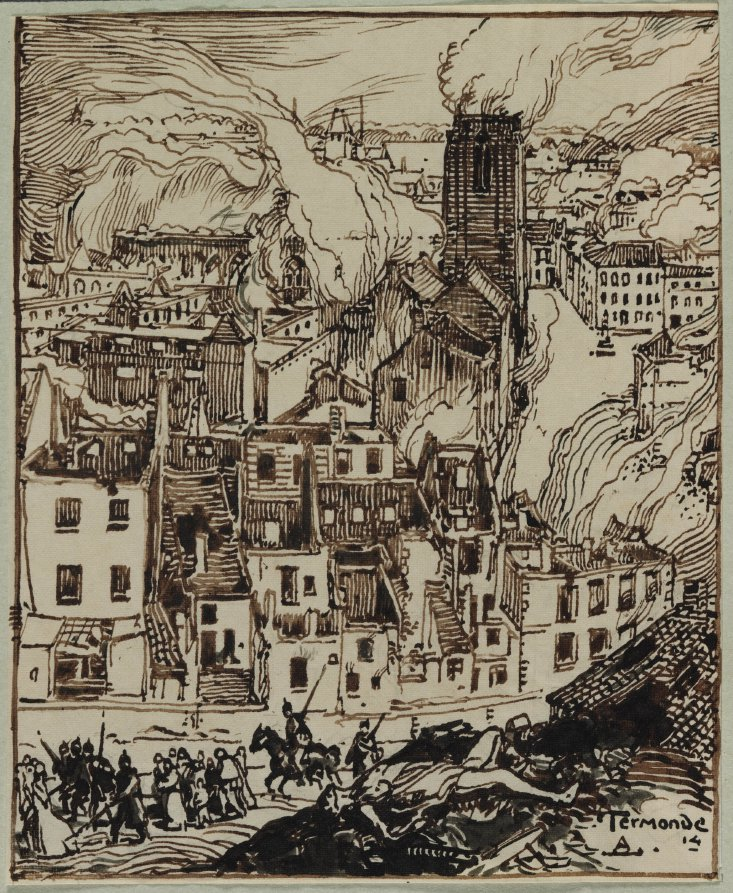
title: Termonde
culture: France, 20th century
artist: Auguste Louis Lepère (French, 1849–1918)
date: 1914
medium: brush and brown ink with touches of black ink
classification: Drawing